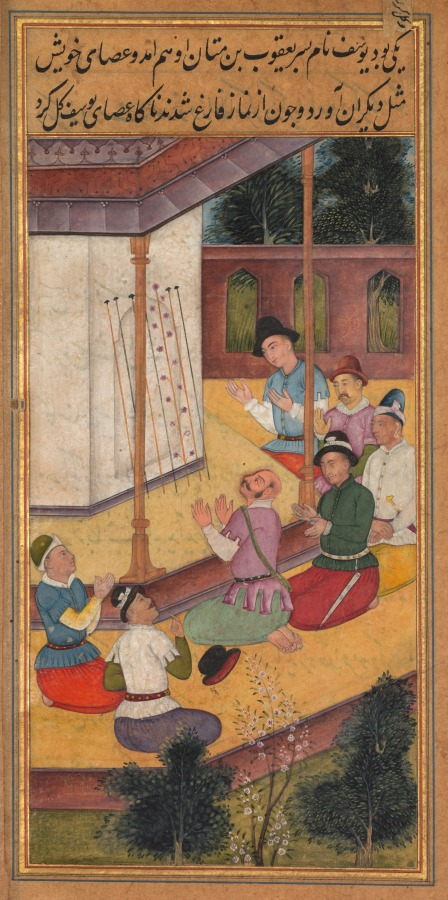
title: The Flowering of Joseph’s Rod (folio 11 verso), from a Mirror of Holiness (Mir’at al-quds) of Father Jerome Xavier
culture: Mughal India, Allahabad, made for Prince Salim (1569–1627)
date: 1602–04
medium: Gum tempera, ink, and gold on paper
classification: Manuscript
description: Joseph kneels outside the temple, among, according to the text, a group of unmarried men. The artist has depicted them dressed like contemporary Portuguese merchants wearing button-down belted shirts. The men had been ordered by God to bring their staffs to the temple; the one whose staff blossoms would become the husband of Mary. Joseph quivers with astonishment as his staff blooms; his hat falls to the ground as though it suddenly came off his head in surprise. Father Jerome’s source for this episode was the apocryphal Gospel of Pseudo-Matthew.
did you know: The suitors in this scene are dressed as contemporary Portuguese men, but have followed the Muslim practice of removing their shoes while in the temple.